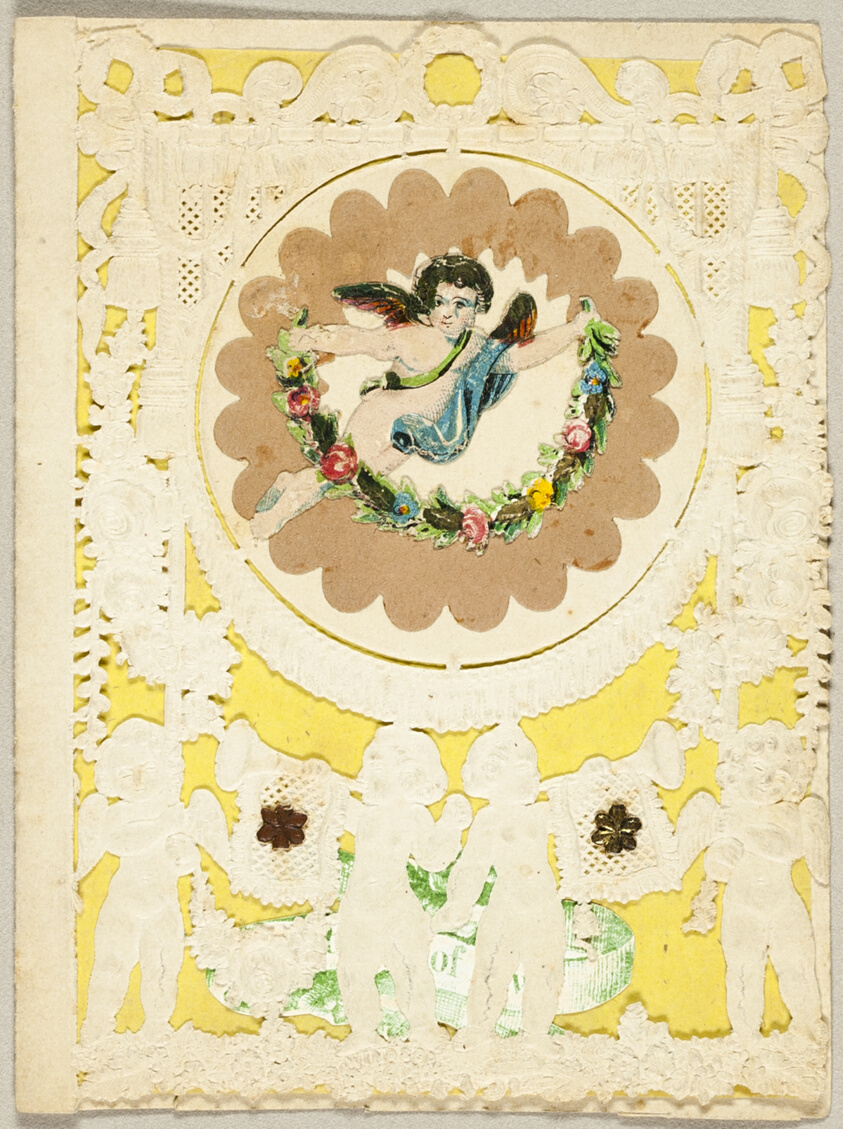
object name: Drawing and Watercolor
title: Untitled Valentine (Cupid with Garland)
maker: John Windsor (English, 19th century)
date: 1850/59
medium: Collaged elements on cut and embossed (designed) ivory wove paper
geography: England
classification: collage; valentine; prints and drawing; paper